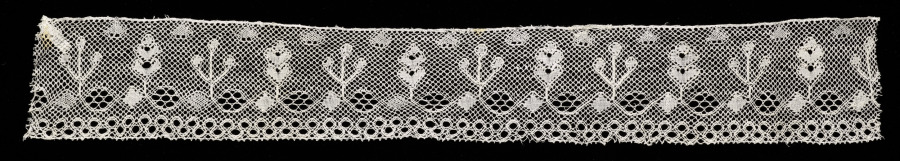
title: Lace Edging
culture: Spain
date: 1800s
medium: Bobbin lace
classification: Lace